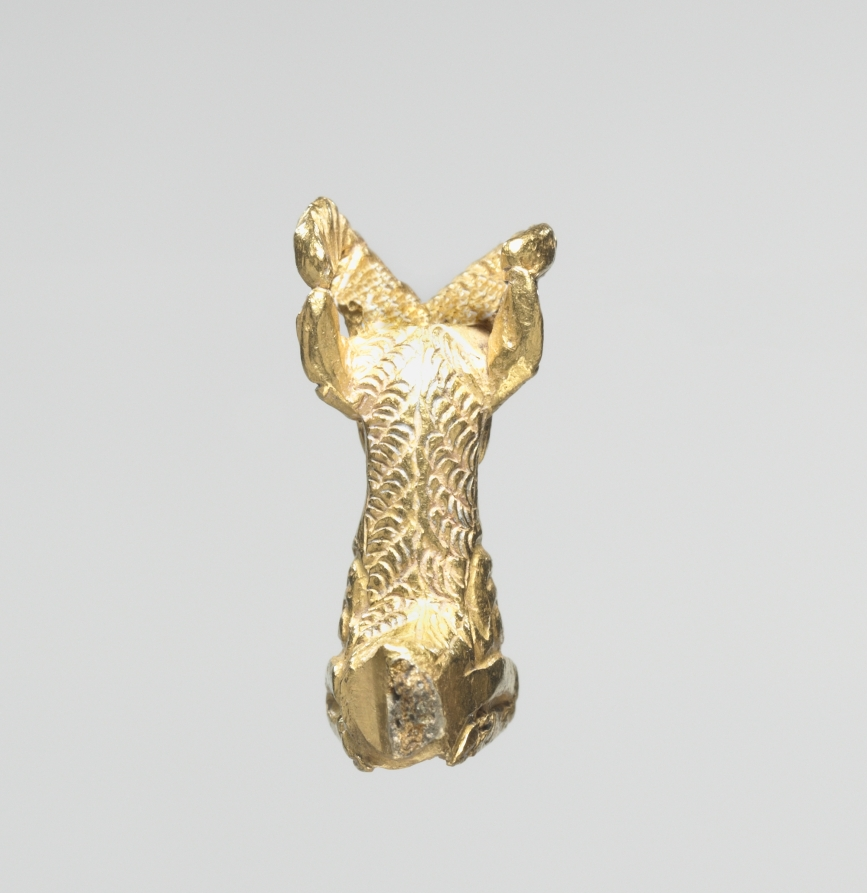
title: Ibex Bracelet Terminal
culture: Iran, Achaemenid (550–330 BCE)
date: 500–400 BCE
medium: gold, solid cast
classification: Jewelry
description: Ibex is also called Persian Wild Goat.